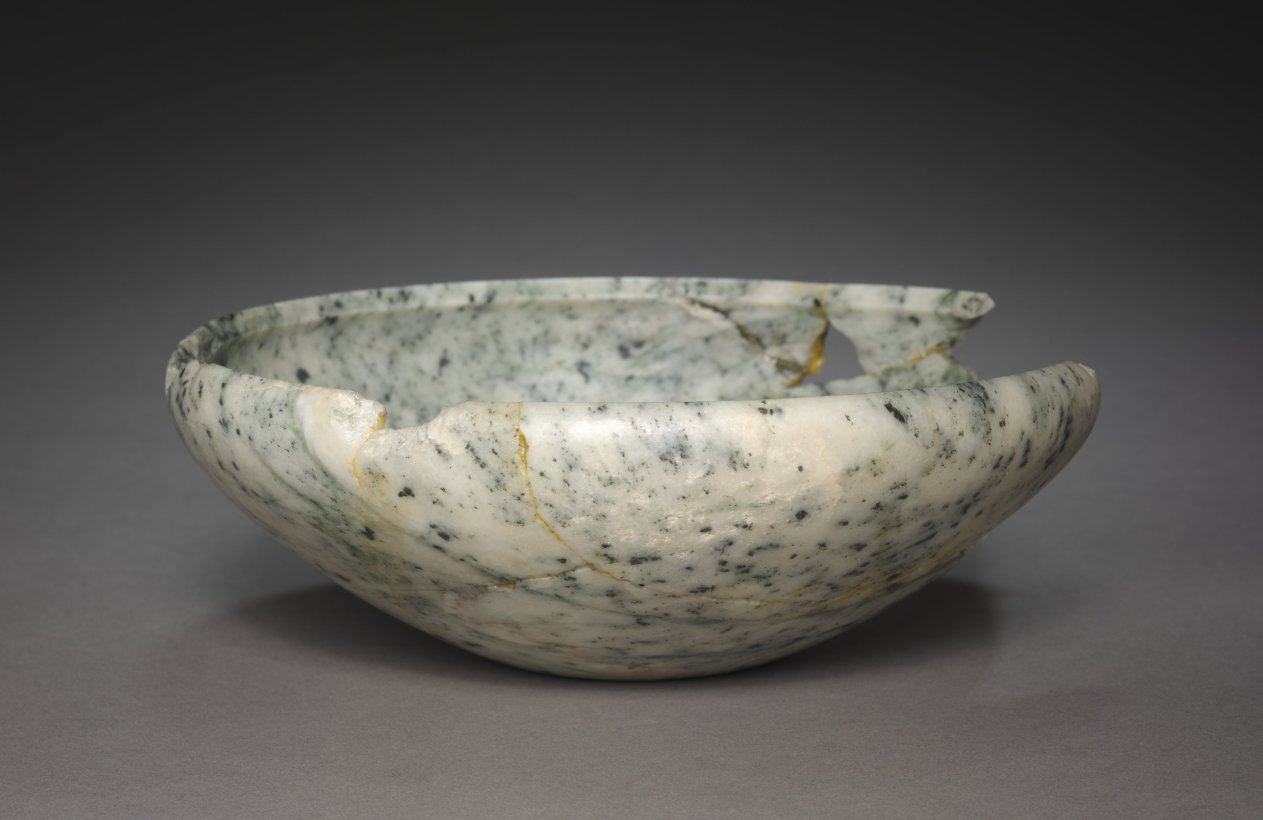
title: Dish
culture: Egypt, Early Dynastic (2950–2647 BCE), Dynasties 2–3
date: 2770–2573 BCE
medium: anorthosite gneiss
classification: Vessels